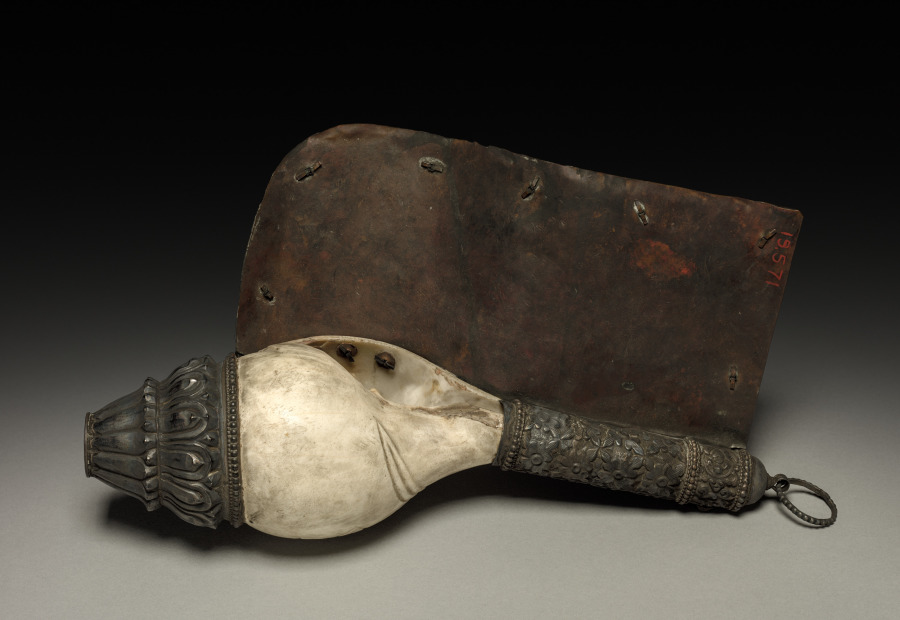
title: Conch Shell Set in Silver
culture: Tibet, 19th century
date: 1800s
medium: shell and silver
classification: Metalwork